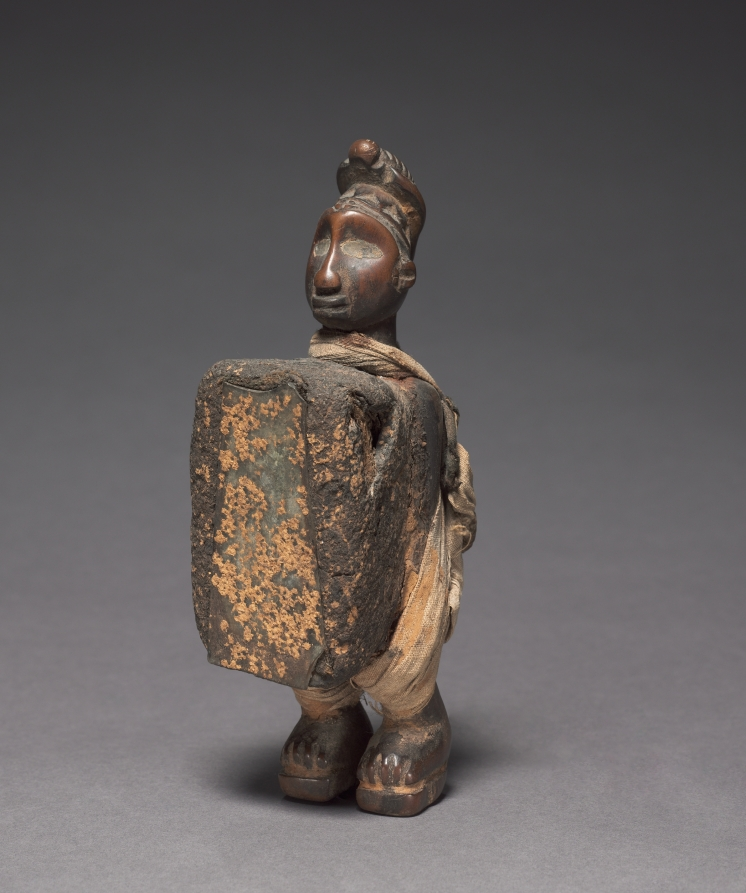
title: Male Figure (Nkisi)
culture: Africa, Central Africa, Democratic Republic of Congo (most likely), Cabinda, or Republic of the Congo, probably Yombe-style maker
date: late 1800s-early 1900s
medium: Wood, organic material (including resin), metalized glass, and cloth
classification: Sculpture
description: Nkisi is often associated with the word spirit, as these figures are believed to host a variety ancestral spirits. With an intact mirror-covered stomach cavity, this figure was not decommissioned before sale or disposal, deeming its particular powers sustained. The cloth knots and carvings suggest that it was used to bind agreements or oaths, and to reconcile social and cosmological contradictions.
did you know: The medicinal substances remain intact in this particular figure, which is rare, as most were decommissioned before museum acquisition.